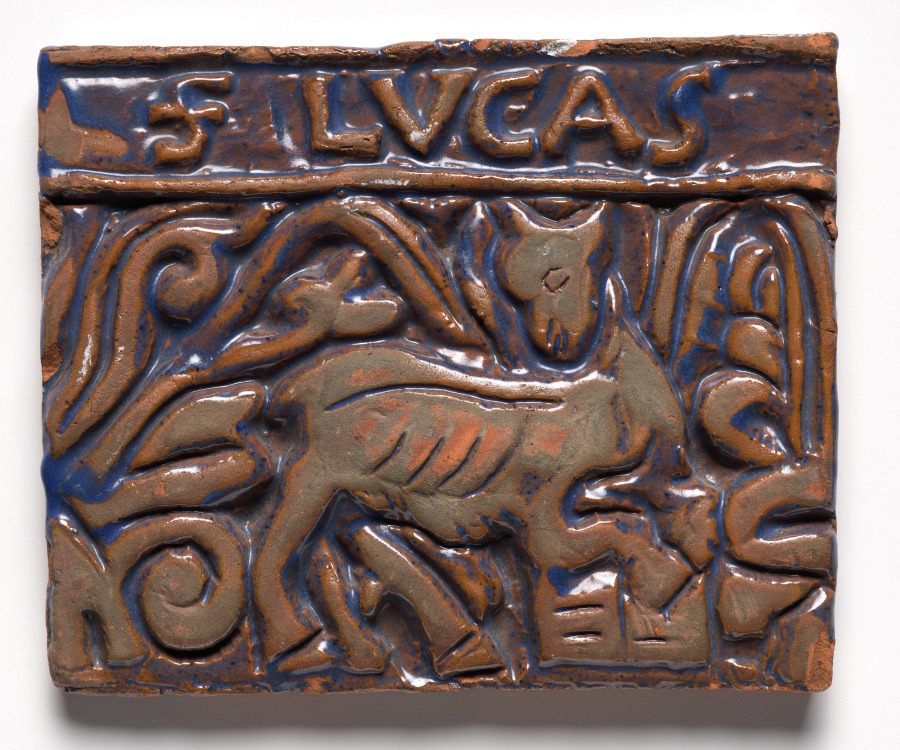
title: Tile- Ox of St. Luke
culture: America, Pennsylvania, Doylestown, Early 20th century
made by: Moravian Pottery and Tile Works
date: before 1921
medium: glazed ceramic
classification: Ceramic